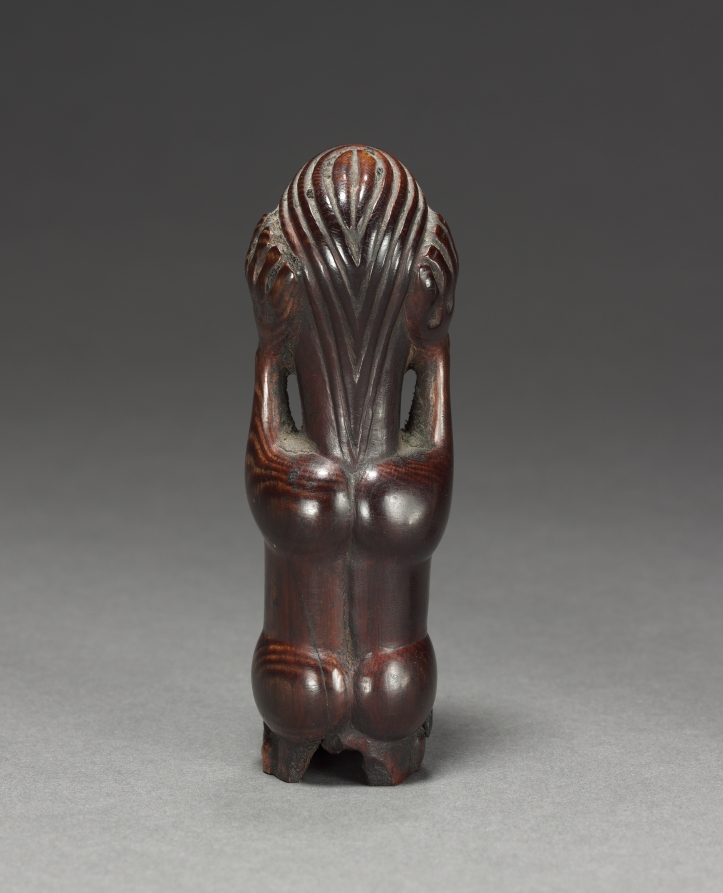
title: Female Figurine or Finial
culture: Central Africa, Democratic Republic of the Congo (most likely), Cabinda, or Republic of the Congo, Kongo people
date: late 1800s-early 1900s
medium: Ivory and iron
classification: Sculpture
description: This ivory figurine most likely served as the finial of a wooden staff or scepter, and owned and used by a high-ranking official or a ritual specialist. The combination of its features is quite unusual. The kneeling attitude is rather common and typically denotes respect. However, the position of the hands is anatomically incorrect with the thumbs toward the face. The idea of the striking hand gesture may refer to mourning.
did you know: The oversized hands with elongated fingers are positioned in an anatomically incorrect manner with the thumbs toward the face.